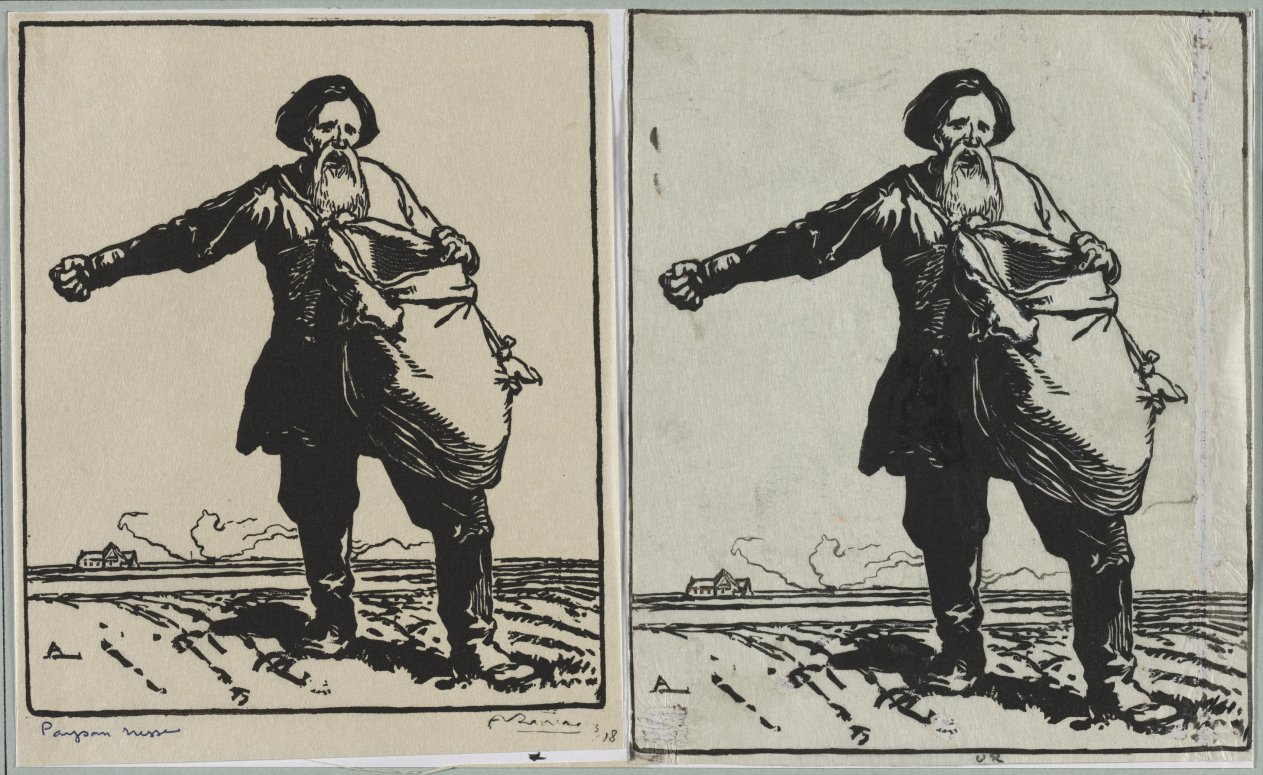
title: Paysan russe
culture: France, 20th century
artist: Auguste Louis Lepère (French, 1849–1918)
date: 1914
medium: woodcut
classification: Print